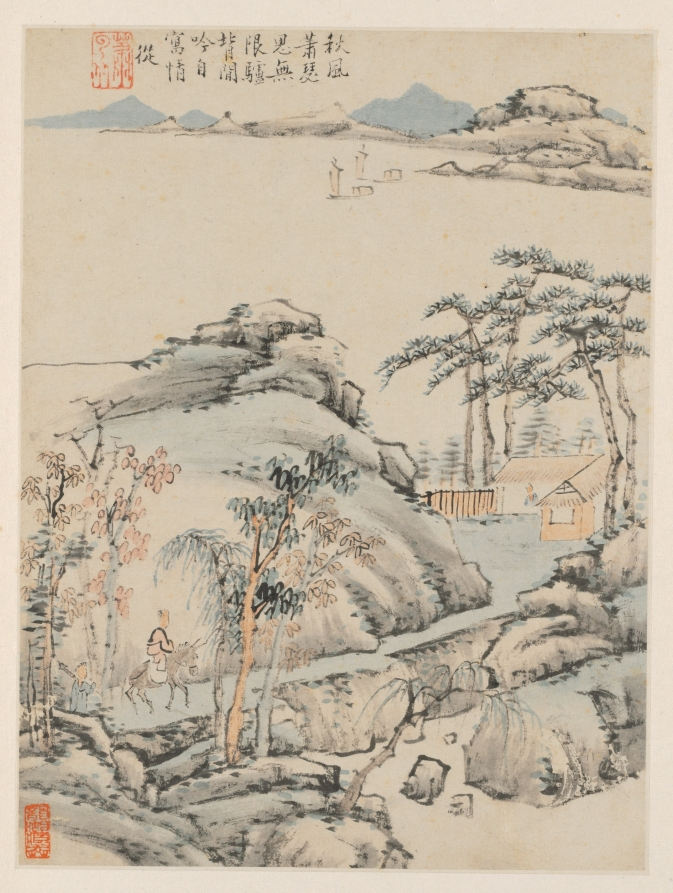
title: Album of Seasonal Landscapes, Leaf F (previous leaf 5)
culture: China, Qing dynasty (1644–1911)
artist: Xiao Yuncong (Chinese, 1596–1673)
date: 1668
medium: album leaf; ink and light color on paper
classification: Painting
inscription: Artist's inscription, signature, and 8 seals: Leaf E. In the autumn wind's lonely soughing,/ My thoughts are without limits./ Humming on the back of a donkey;/ I write down my feelings. Yuncong [seal] Xiao Yuncong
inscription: 9 additional seals: 2 of Chen Yixi 陳奕禧 (1646-1709); 4 of Li Yufen 李玉棻 [Li Yunhu 李韵湖] (active mid-1800s); 3 unidentified.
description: Throughout his lifetime, Xiao Yuncong visited Nanjing and Yangzhou, cities embedded in the fertile and water-rich Jiangnan region, as reflected in his paintings. Xiao painted from nature, and his landscapes are informed by the seasons and his travels, as well as by his experience as a print designer. Xiao’s fresh, light colors continue to appear in later Shanghai school paintings. This album was formerly in the collection of Li Yufen in Yangzhou and then owned by Wu Hufan in Shanghai. While the artist impressed his seal consistently below his poetic inscriptions in the upper parts of the composition, the red seals on the margins and in the lower corners of the paintings are impressions by the album’s previous owners.